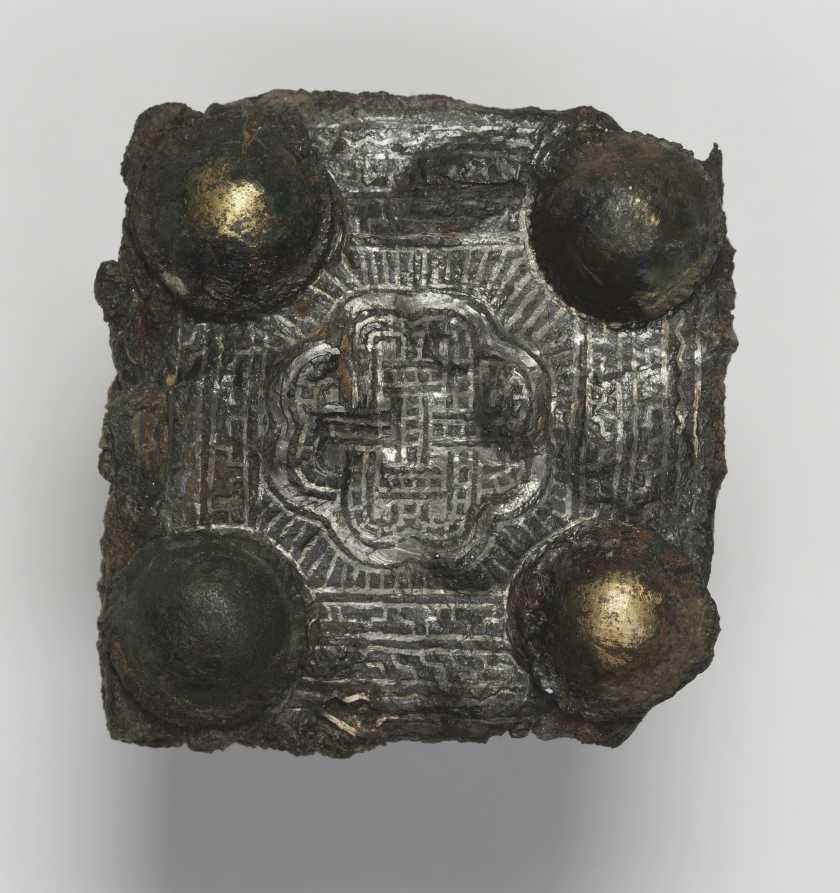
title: Belt Plate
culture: Frankish, Migration period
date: 600s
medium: iron with silver overlay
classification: Jewelry